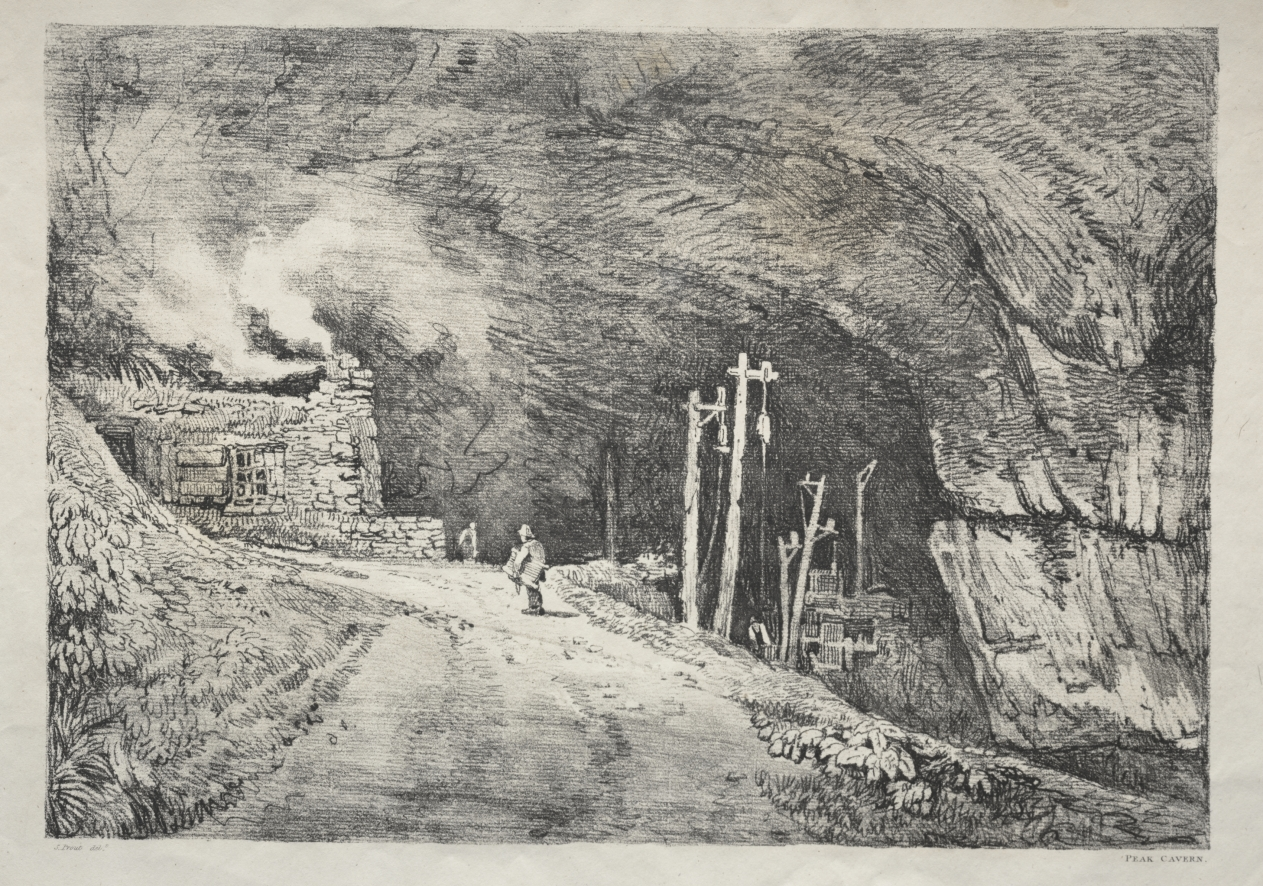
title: A Series of Ancient Buildings and Rural Cottages in the North of England: Peak Cavern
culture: England, 19th century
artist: Samuel Prout (British, 1783–1852)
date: 1821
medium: softground etching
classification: Print